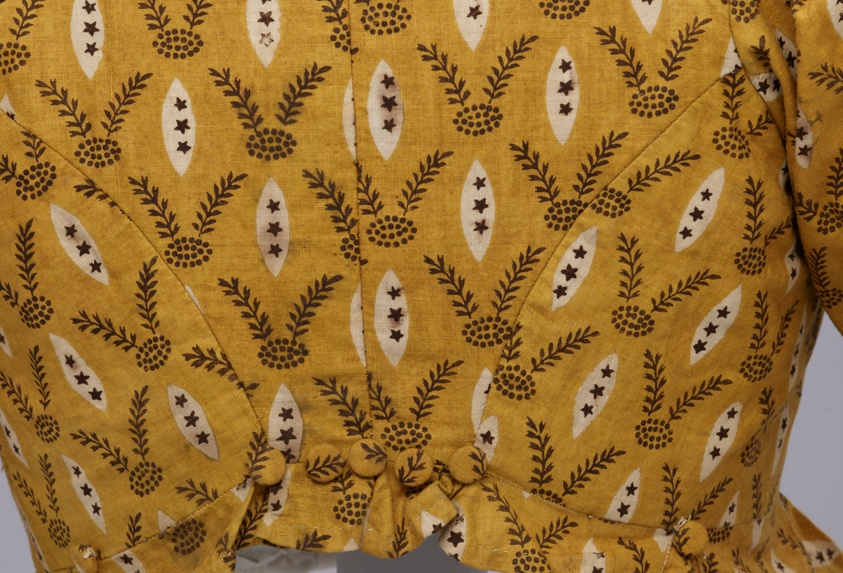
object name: Costume and Accessories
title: Woman's Spencer jacket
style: 17th Century, 18th Century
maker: France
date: c. 1800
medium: Cotton, plain weave, hand-block printed; cotton lining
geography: France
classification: dress (garment); costume - printed; costume - weaving; clothing; garment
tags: lattices, floral, stars, clothing